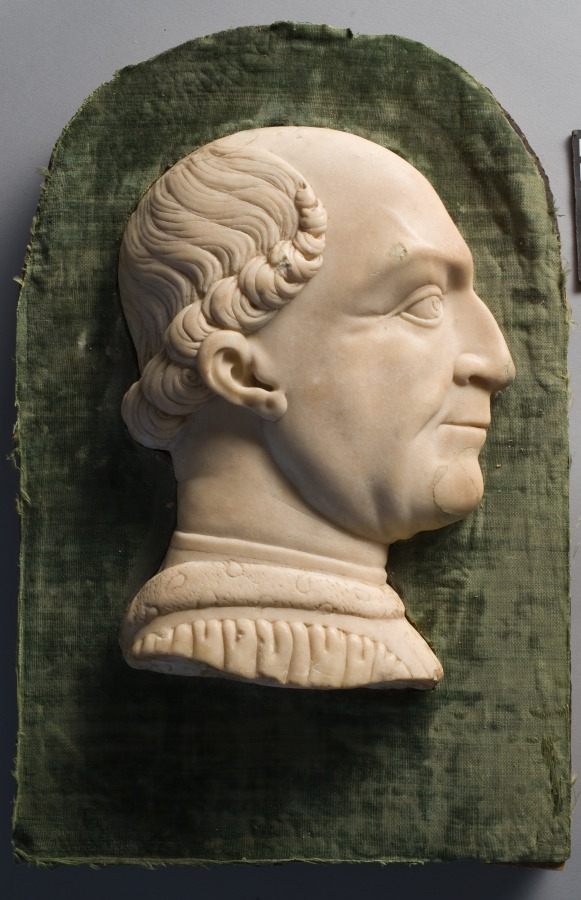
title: Portrait of Francesco Sforza and Frame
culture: Italy, Lombardy, 15th century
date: 1450–1499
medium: marble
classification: Sculpture